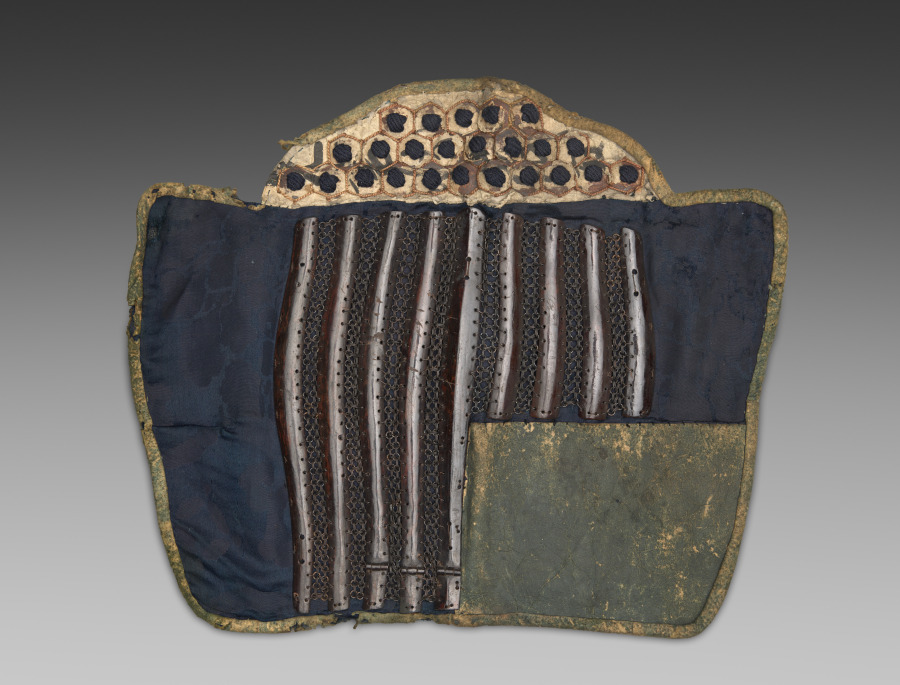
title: Shin Guard (Sune-ate)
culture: Japan, Edo period (1615–1868)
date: 1615–1868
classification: Arms and Armor